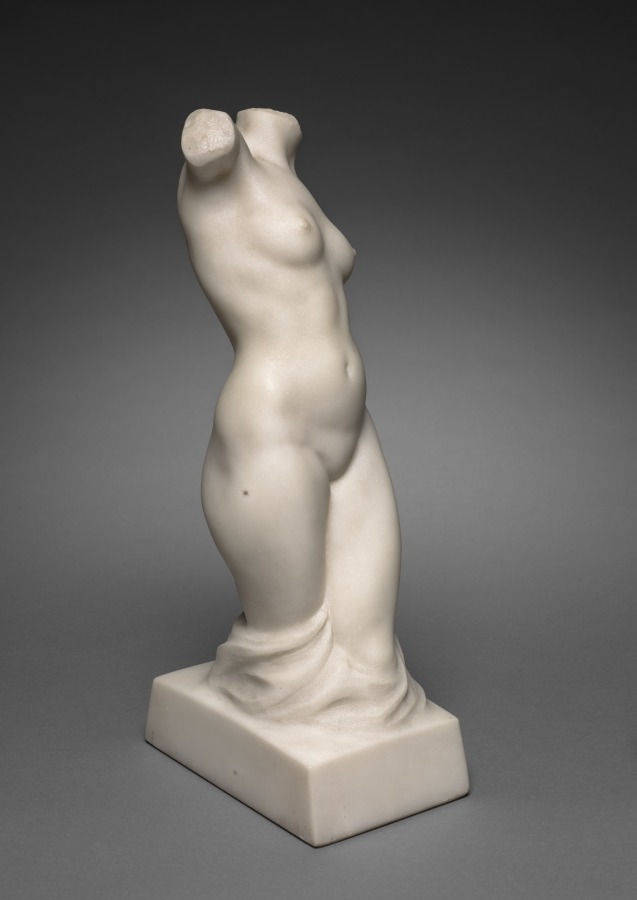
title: Torso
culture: America, Ohio, Cleveland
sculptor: Max Kalish (American, born Russian Empire [now Lithuania], 1891–1945)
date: 1924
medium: marble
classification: Sculpture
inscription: Signed on right side near side of base.: "M. Kalish 24"